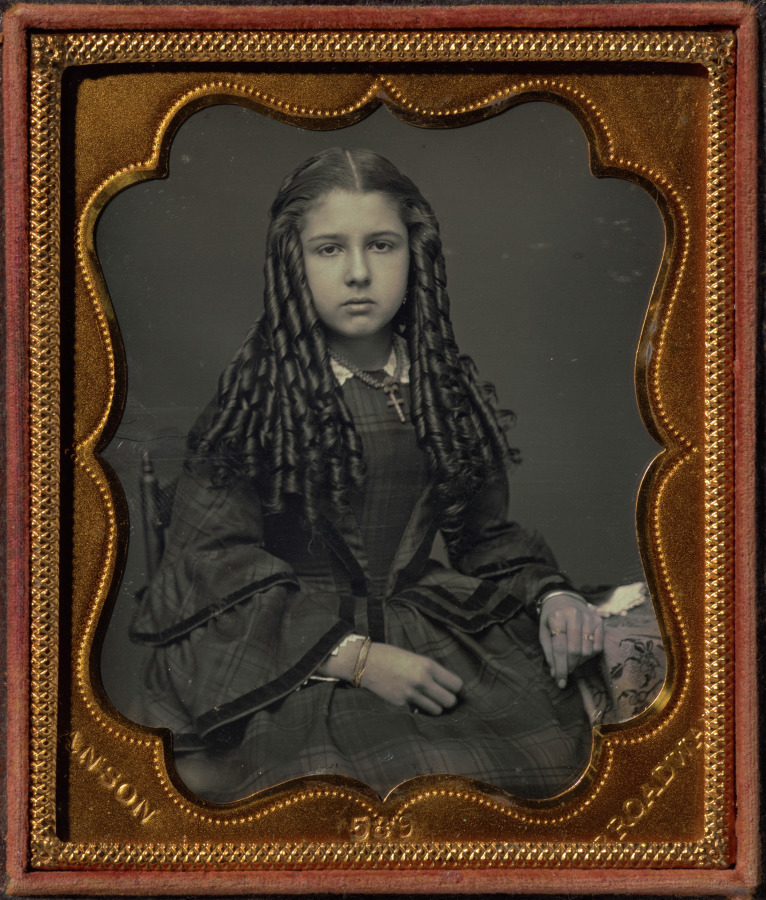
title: Teenage girl with bottle curls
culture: America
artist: Rufus Anson (American, 1820–1900)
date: c. 1855–60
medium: daguerreotype, sixth plate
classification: Photograph